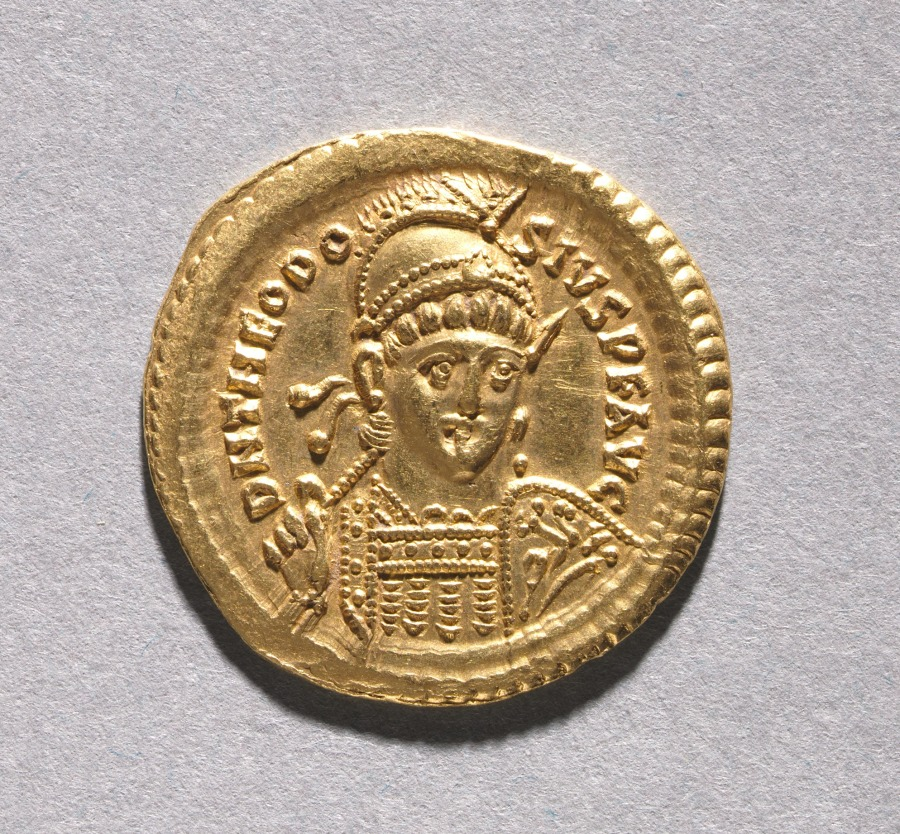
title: Solidus of Theodosius II and Valentinian III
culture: Byzantium, Constantinople, Byzantine period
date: 408–425 CE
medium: gold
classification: Coins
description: Byzantine Gold Coins The vast number of surviving Byzantine coins attests to the level of trade across the empire. Controlled and supervised by the emperor, the producers of coins took care to represent his authority and reflect his stature. Talented artists were recruited to engrave the dies (molds) used for the striking of coins. Emperors increasingly came to include their heirs and co-emperors on their coinage, as well as other family members or even earlier rulers. Coins were recognized, then as now, as small, portable works of art. With their inscriptions and images, Byzantine coins provide valuable documentation of historical events and a record of the physical appearance of the emperors. The coins shown here include the solidus, the basic gold coin of 24 karats; the tremissis, a gold coin of one-third the weight and value of the solidus; and the nomisma, which in the 10th century replaced the solidus as the standard gold coin.